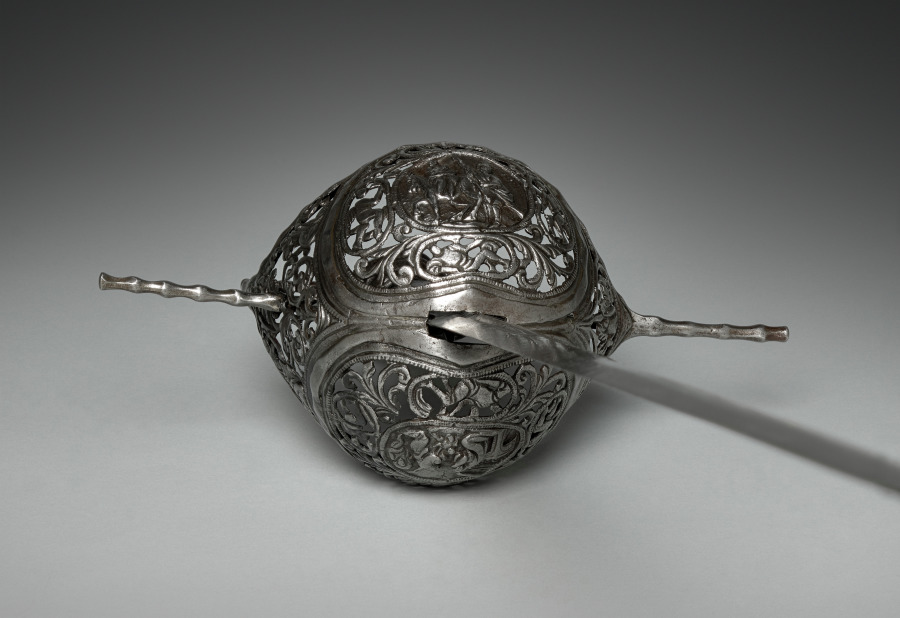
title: Cup-Hilted Rapier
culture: Italy, Milan?, 17th century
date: c.1610–30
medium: steel, pierced, chased and chiseled; wire ferrules on leather-covered wood grip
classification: Arms and Armor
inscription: inscribed on blade: FPNDRITH (on one face) RDFTPHNI (on the other)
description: The rapier was a sword worn with civilian dress and used in duels. The term rapier derives from a 16th-century French word rapière, which in turn derived from the Spanish espada ropera, or “dress sword.” The rapier was a light weapon with a straight double-edged and pointed blade that, with the development of the art of fencing in the 1500s and 1600s, gradually became narrower and lighter, and thus suitable for thrusts only. With the new technique of swordplay emphasizing the point of the blade, sword guards became more complex to protect the duelist’s unarmored hand. These elaborate guards were frequently decorated by various techniques—chiseling, bluing, russeting, and damascening.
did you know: Over time the blade of a rapier became longer, based on a belief that a longer blade made it easier to hit one's adversary and, at the same time stay beyond the reach of his weapon.